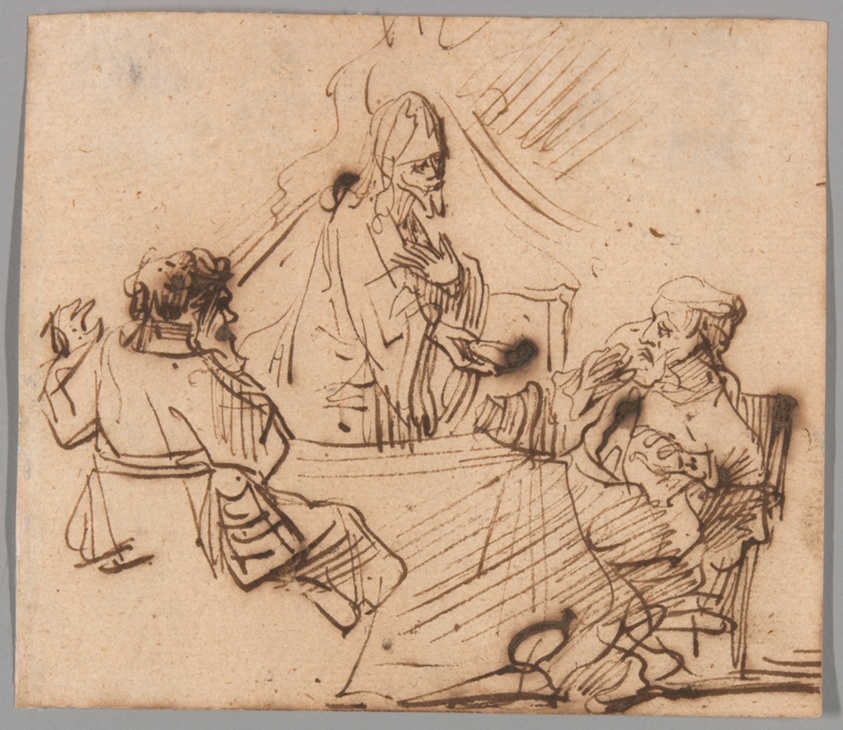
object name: Drawing and Watercolor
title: The Supper at Emmaus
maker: Follower of Rembrandt van Rijn (Dutch, 1606-1669)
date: 1626/69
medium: Pen and brown ink on cream laid paper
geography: Netherlands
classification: pen and ink drawings; paper; drawings (visual works); prints and drawing